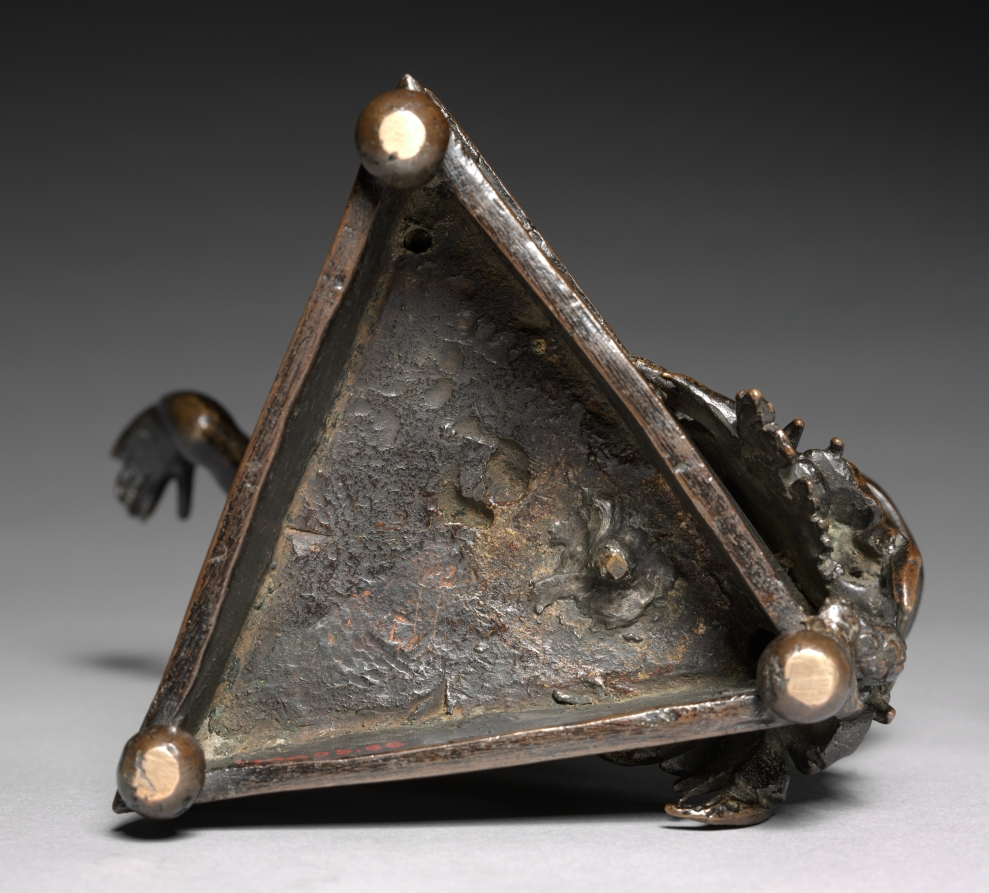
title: Kneeling Satyr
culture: Italy, Ravenna, 16th century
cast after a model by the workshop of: Severo da Ravenna (Italian, c.1496–c.1543)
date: c. 1520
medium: bronze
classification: Sculpture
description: Greek and Roman art and literature typically used satyrs as a form of grotesque comic relief, but Renaissance artists adopted them as jovial celebratory figures of nature and revelry.